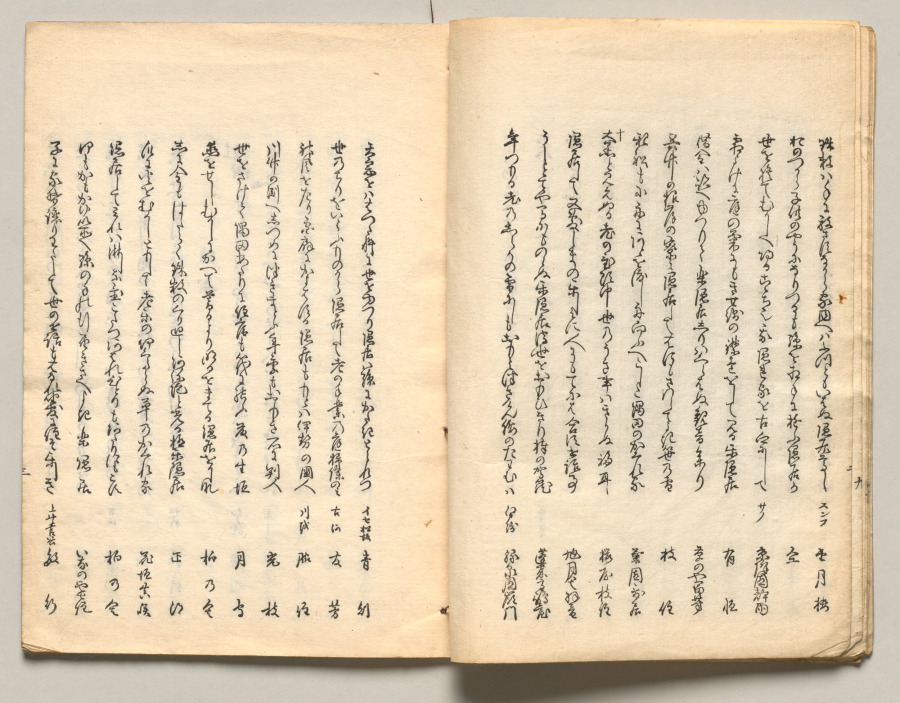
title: Spread Eleven from Volume Four of People of Japan in Light Verse (Kyōka)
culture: Japan, Edo period (1615–1868)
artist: Utagawa Hiroshige (Japanese, 1797–1858)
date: 1857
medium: Woodblock-printed book; ink and color on paper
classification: Bound Volume